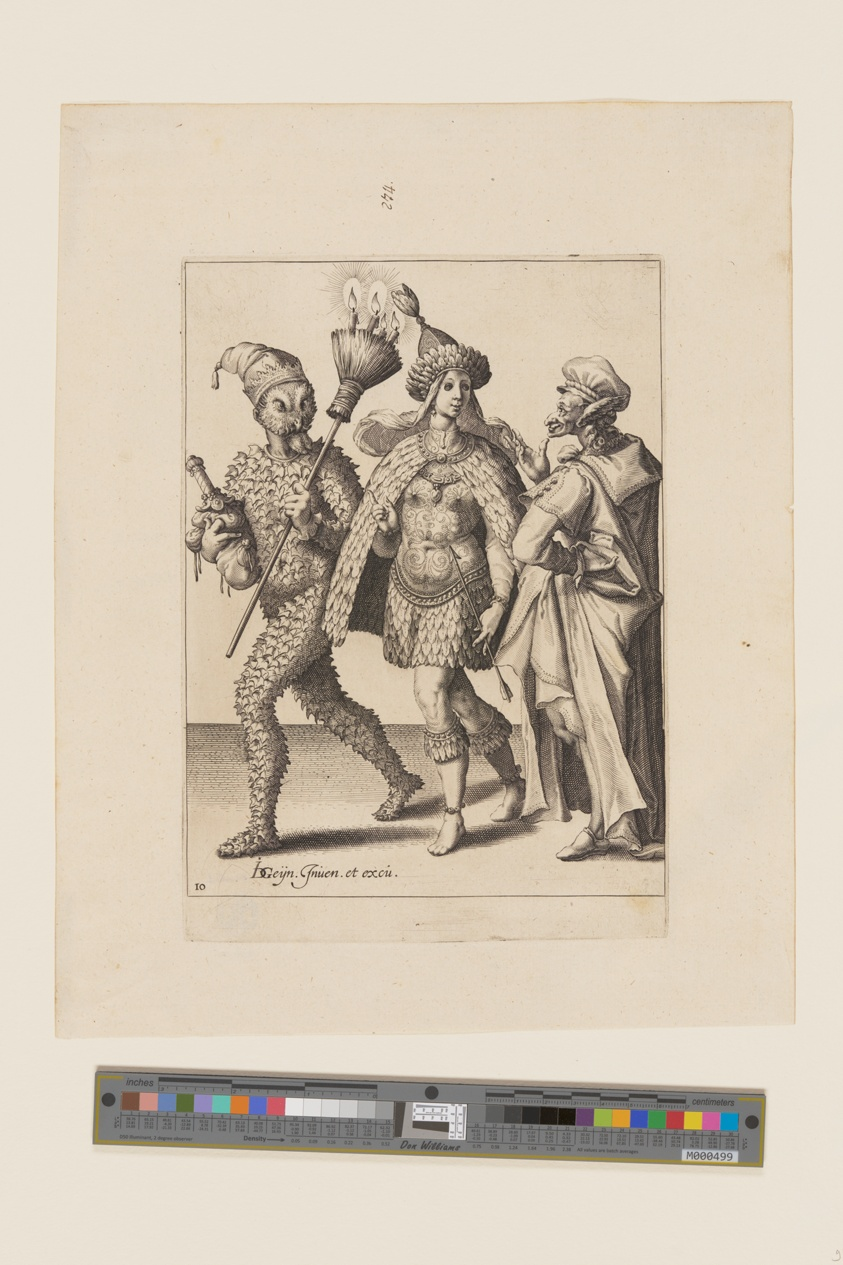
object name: Print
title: An Old Mummer Addressing a Couple Dressed in Leaves and Bird Feathers, from The Masquerades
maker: Jacques de Gheyn II; Dutch, 1565–1629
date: 1595-96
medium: Engraving on ivory laid paper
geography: Netherlands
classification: engraving; paper; print; prints and drawing